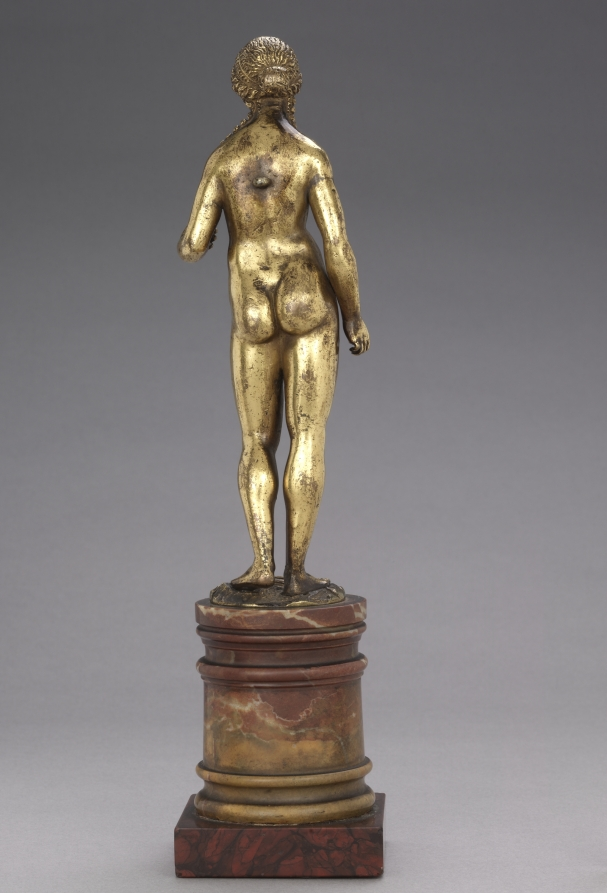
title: Venus with a Burning Urn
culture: Northern Italy, 16th century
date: c. 1500–1520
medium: gilt bronze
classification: Sculpture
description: Venus is the Roman goddess of many virtues, including Love, Charity, Fertility, and Victory. Here, Venus is represented as the goddess of Charity. She wears a crown, as Charity is often depicted as the Queen of the Virtues. The flaming lamp in Venus's left hand was also a symbol of Charity in Venice, where this piece is thought to have originated. The bent fingers of her right hand are bent suggest that Venus may have once held another object. Renaissance sculptors often looked back to antiquity when producing monumental and small bronze statues. The small bronze cabinet piece comes into Italian art during this time, bringing ancient gods and goddesses into Italian households. Venus stands in a contrapposto pose and, like Hellenistic and Roman objects, her locks are tied by a double ribbon while two curls fall on her shoulders. Her tilted head and large emotional eyes, as well as her small nose and parted lips reflect the influence of Hellenistic Greek facial styles.